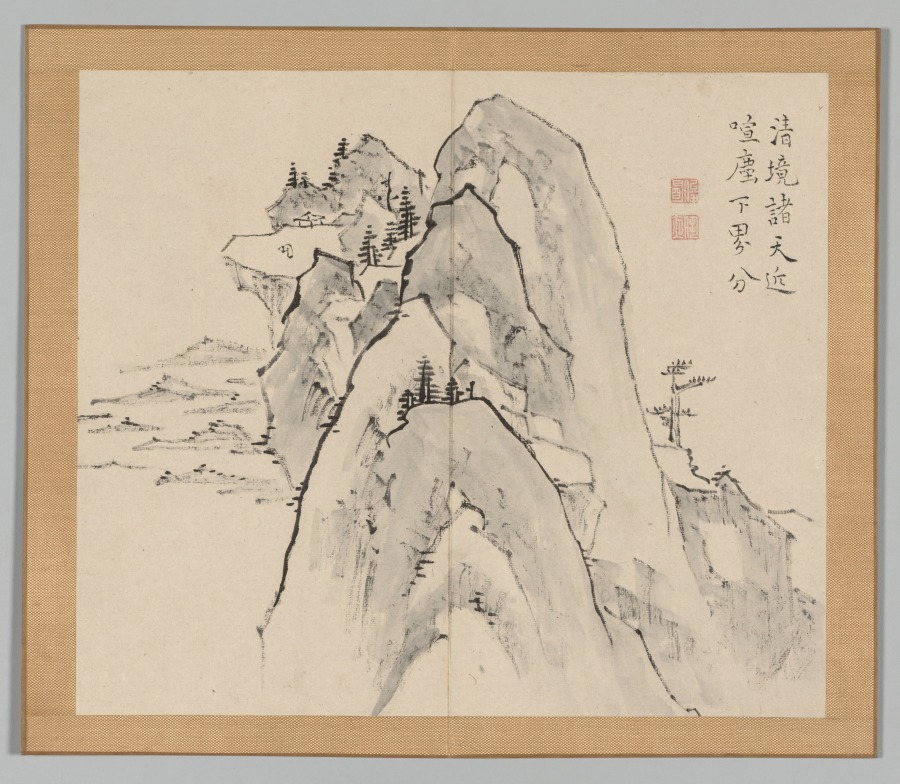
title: Reverberations of Taiga, Volume 2 (leaf 33)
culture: Japan, Edo period (1615–1868)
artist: Aoki Shukuya (Japanese, d. 1802)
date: mid- to late 1700s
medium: double-leaf from a pair of albums; ink and light color on paper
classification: Portfolio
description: Traditionally, young painters in Japan began their studies with an established master-painter. The master's compositions invariably became models that the apprentice copied to learn various ink and brush techniques. Shukuya was a pupil of the famous Kyoto artist Ikeno Taiga, whose style is reflected in these sketches of rocks, trees, and mountains.